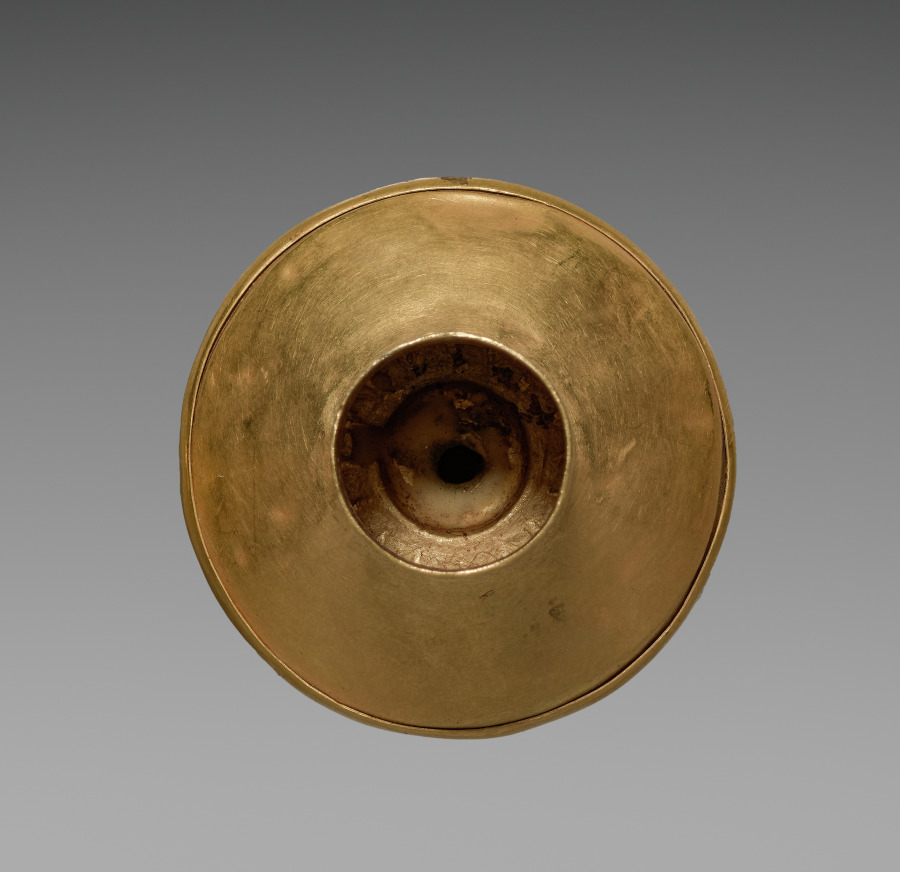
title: Ear Spool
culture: Panama, Conte style, 5th - 10th century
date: c. 400–900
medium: hammered gold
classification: Metalwork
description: Harvard archaeologists excavated this and seven other ornaments from several burials at Sitio Conte, a cemetery famous for its lavish graves of powerful chieftains. The young man buried in Grave 26 was such a chief. His status was stunningly memorialized by 21 human companions and 475 objects, many of them personal ornaments made of gold, including a large chest plaque and a rod-shaped ear ornament.